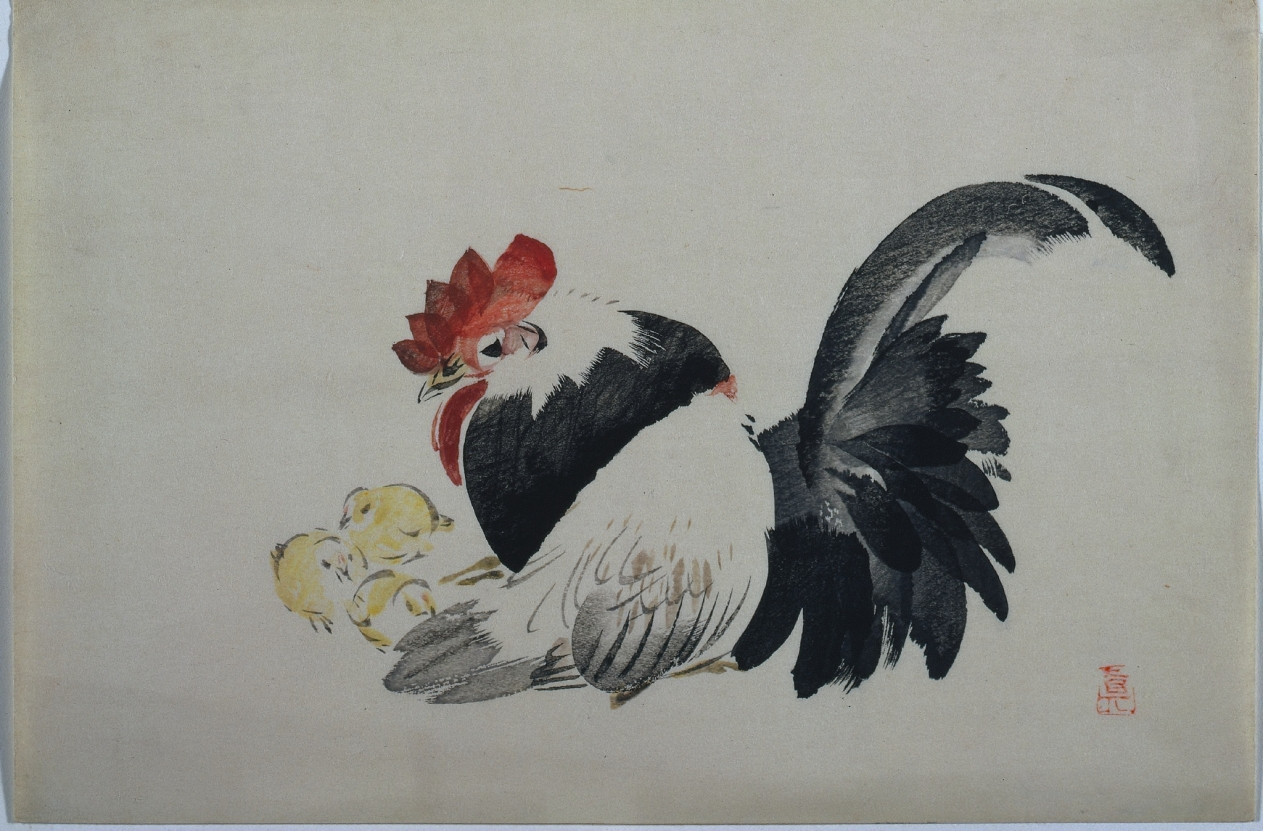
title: Rooster, Hen, and Chicks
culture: Japan, Edo period (1615–1868)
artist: Shibata Zeshin (Japanese, 1807–1891)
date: c. 1880s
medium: color woodblock print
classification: Print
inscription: Artist Seal: Shin